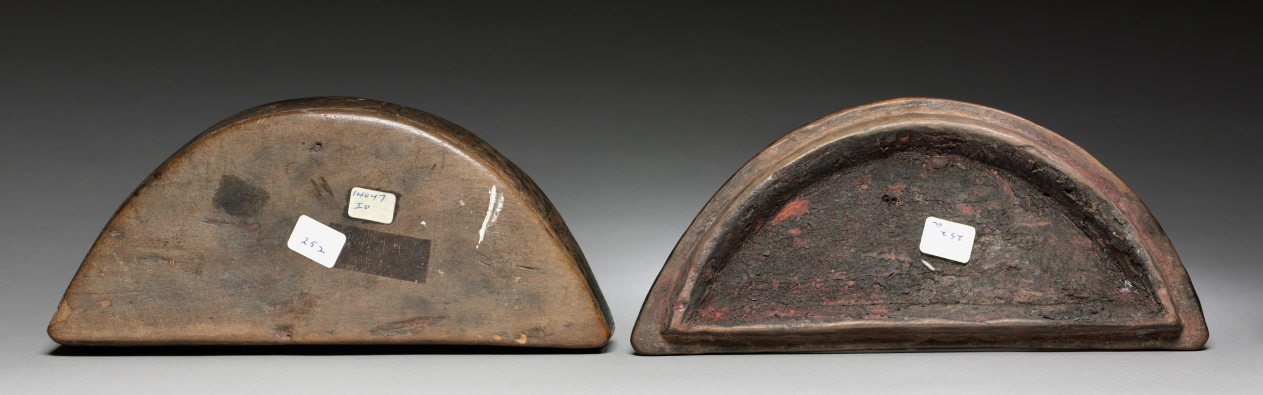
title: Box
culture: Africa, Central Africa, Democratic Republic of the Congo, Kuba-style maker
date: early 1900s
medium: Wood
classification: Vessels